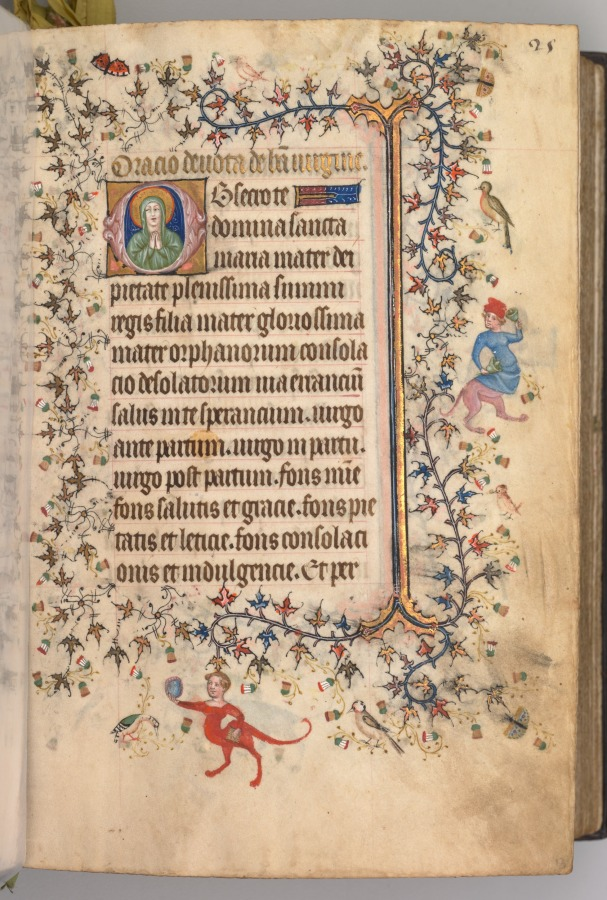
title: Hours of Charles the Noble, King of Navarre (1361-1425): fol. 13r, Text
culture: France, Paris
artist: Master of the Brussels Initials and Associates (French)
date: c. 1405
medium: ink, tempera, and gold on vellum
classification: Bound Volume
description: This precious book was highly prized by its owner, Charles III, King of Navarre, a French-born prince whose coat of arms is painted on 20 folios. Charles visited Paris on numerous occasions and likely acquired this volume there in 1404. Paris was the center of the European book trade at the time and attracted illuminators from many parts of Europe. This manuscript represents one of the most remarkable fusions of French and Italian taste in book illumination. Though conforming to Parisian standards, most of the book’s major miniatures are the work of the Brussels Initials Master, an Italian illuminator who previously worked in Bologna and Padua.